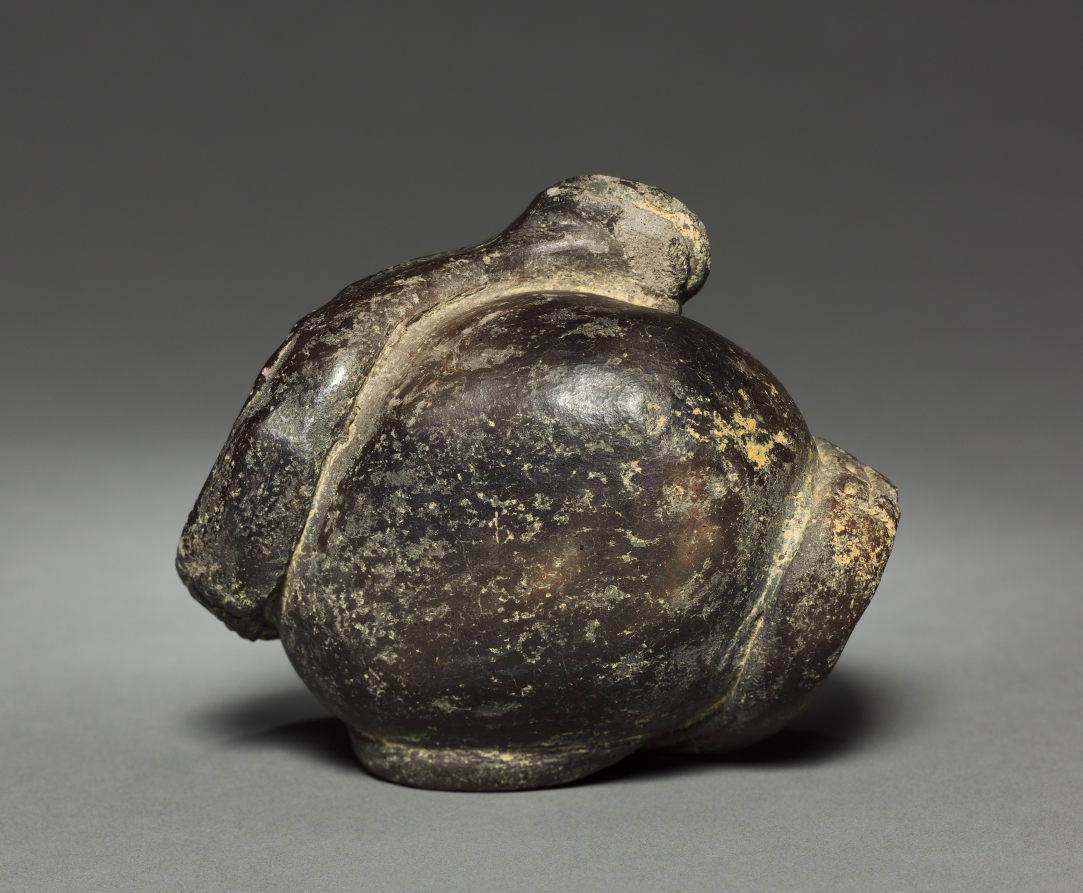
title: Coiled Snake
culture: Colombia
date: before 1921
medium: pottery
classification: Ceramic